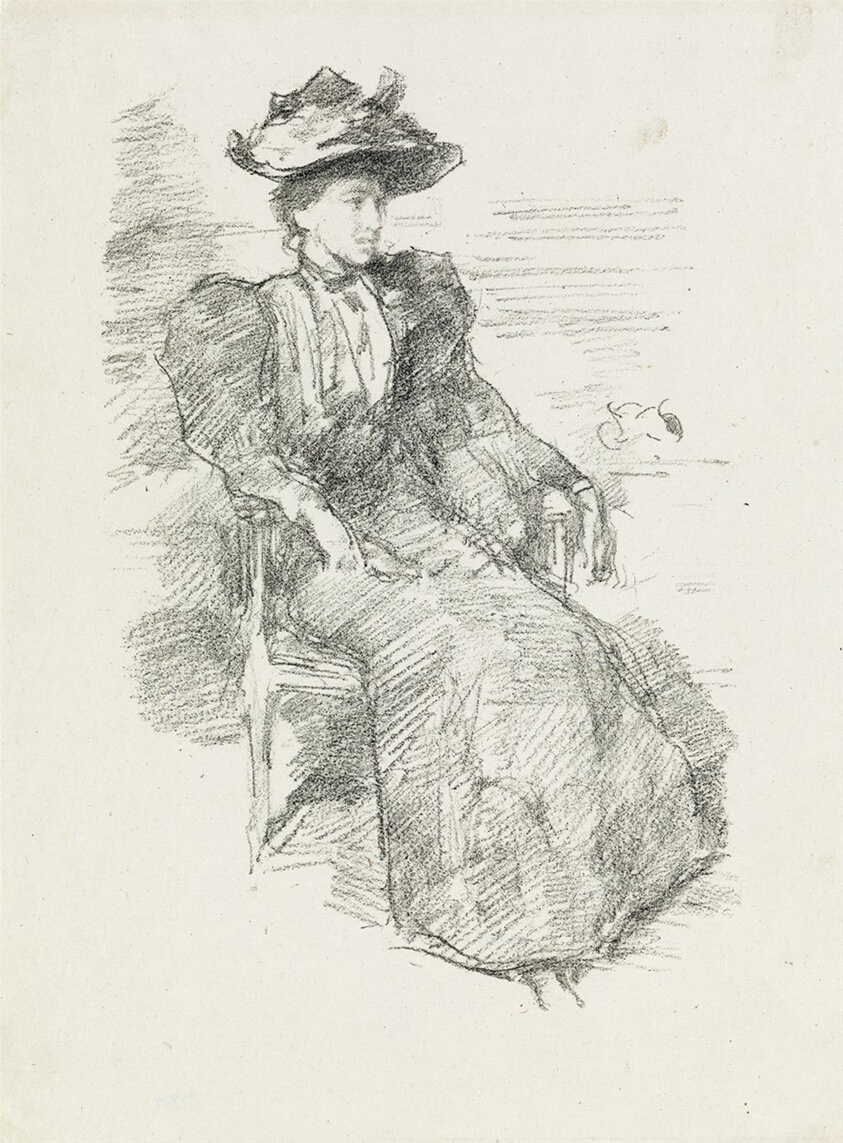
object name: Print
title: A Portrait: Mildred Howells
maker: James McNeill Whistler (American, 1834-1903)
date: 1894/96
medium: Transfer lithograph in black on ivory laid paper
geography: United States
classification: transfer lithograph; lithograph; print; prints and drawing; paper